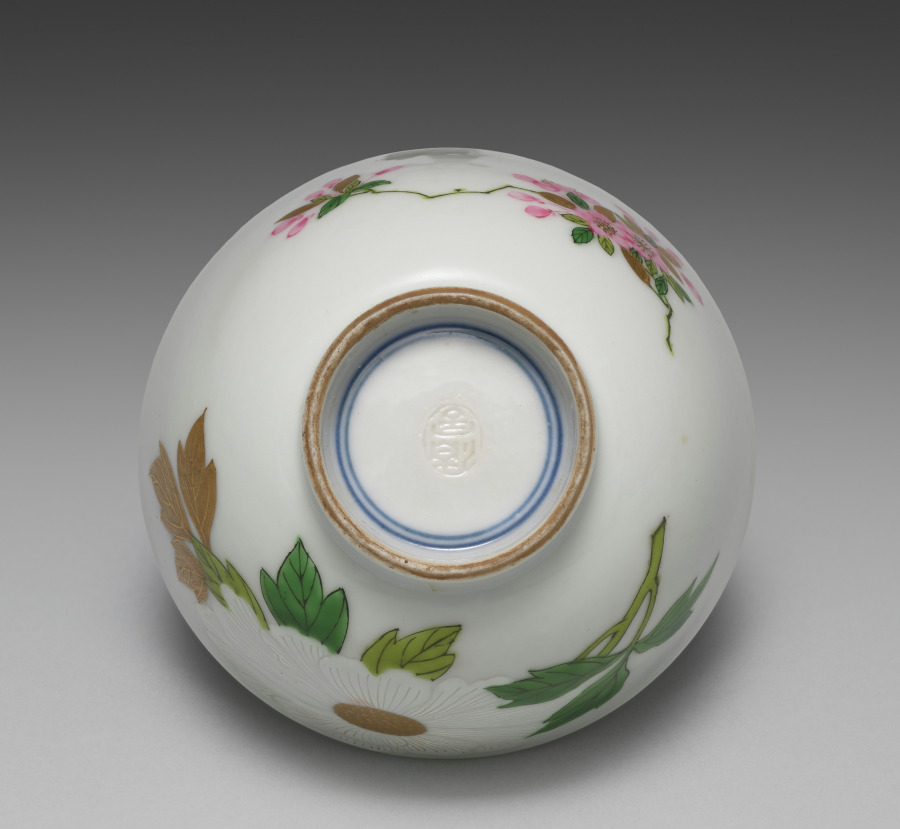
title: Teabowl from Teabowls with Peony and Crabapple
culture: Japan, Meiji period (1868–1912)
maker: Seifū Yohei III (Japanese, 1851–1914)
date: 1893–1914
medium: One from a set of five teabowls; porcelain with underglaze and overglaze color enamels and gold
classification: Ceramic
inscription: 清風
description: Overglaze color enamels are generally called iro-e (literally “color picture”) in the terminology customarily used for porcelain decoration of the Edo period. This set of teabowls is a fine example of Yohei III’s skilled use of the technique, which is identified on this set’s box lid with the alternate phrasing “porcelain with color painting” (jisaiga). Distinct from the way overglaze colors were used in Kakiemon ware from Arita, his designs and applications show a consciousness of porcelain decoration of the Qing dynasty. Here, he combines Chinese models with a sensibility taken from Kyoto ware precedents, including painting with powdered gold (kinrande). The colors used in the bowls are as follows: blue, black, gold, white, light green, green, and pink. The blue appears only inside the footring, as a double band of underglaze color. The black iron, used for stems and leaf veins, is painted over the glaze. The gold, also painted over the glaze, is used for leaves and the centers of flowers, for solid, glossy lines defining detail, or as a semimatte ground. The white of the peony flower is built up to a low relief over the glaze. Yohei has incised lines of varying widths into the pigment, carving away to the bowl’s surface, to differentiate individual petals and their rippled shapes. The light and dark greens, as well as the pink, are painted over the glaze. Of note is how Yohei has first used thinly applied lines of light green to draw the plum branch before applying the opaque iron black. For the plum buds and flowers, he has used a diluted pink with an opaque pink for outline, both over the glaze. In his later works, Yohei used pink both over and under the glaze in a manner similar to underglaze blue, and it can be challenging in some cases to discern which technique he has used. A lidded container in a private collection has a similar design but is augmented with the inclusion of white and purple magnolia blossoms. In contemplating the original decorative program of a set, of which these teabowls may have been a part, it is worth considering that perhaps not all objects included the full range of motifs. In such cases, the composition of the individual object may be best understood within the context of the extended ensemble. Here, the delicate pink plum on one side of the bowl seems slightly unbalanced with the bold white peony on the other, but when seen with other objects with the magnolia and its additional colors and shapes, it is possible to imagine a set with a complex, balanced design across multiple pieces.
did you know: "Seifū" is inscribed on the base in a double band of underglaze color.